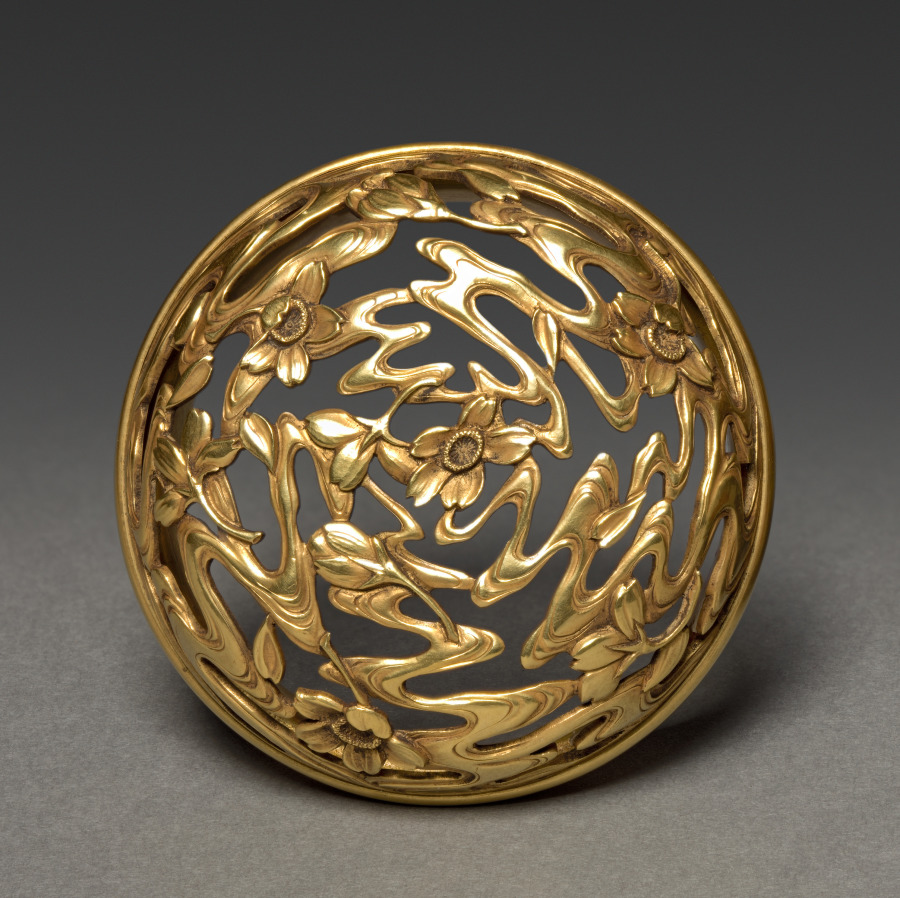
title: Incense Burner with Floral Scroll (lid)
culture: Japan, Edo period (1615–1868)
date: early to mid-1800s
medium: bronze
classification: Ceramic